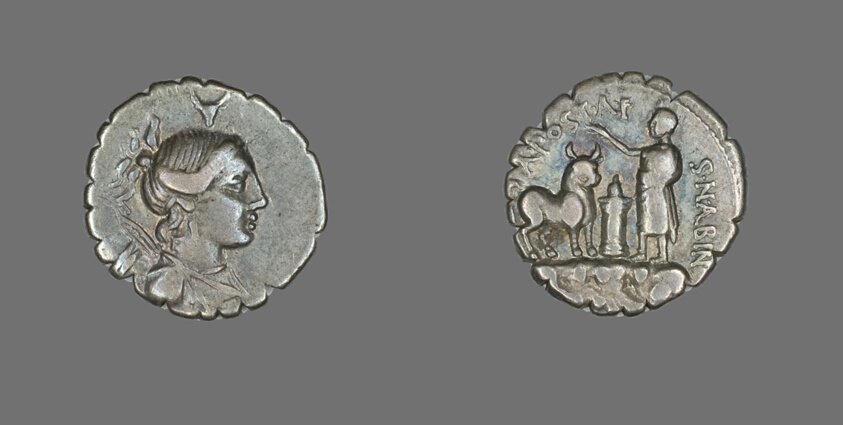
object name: Coin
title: Denarius Serratus (Coin) Depicting the Goddess Diana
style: roman (ancient, style or period), ancient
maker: Roman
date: about 81 BCE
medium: Silver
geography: Roman Empire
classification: coin; ancient art